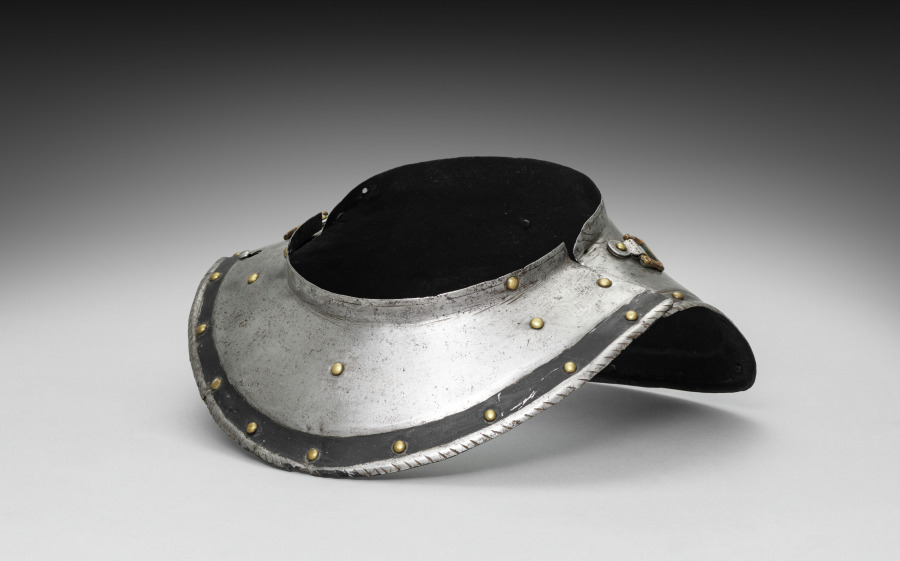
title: Colletin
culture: Germany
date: c.1550–1570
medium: iron, steel, leather and brass rivets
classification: Arms and Armor